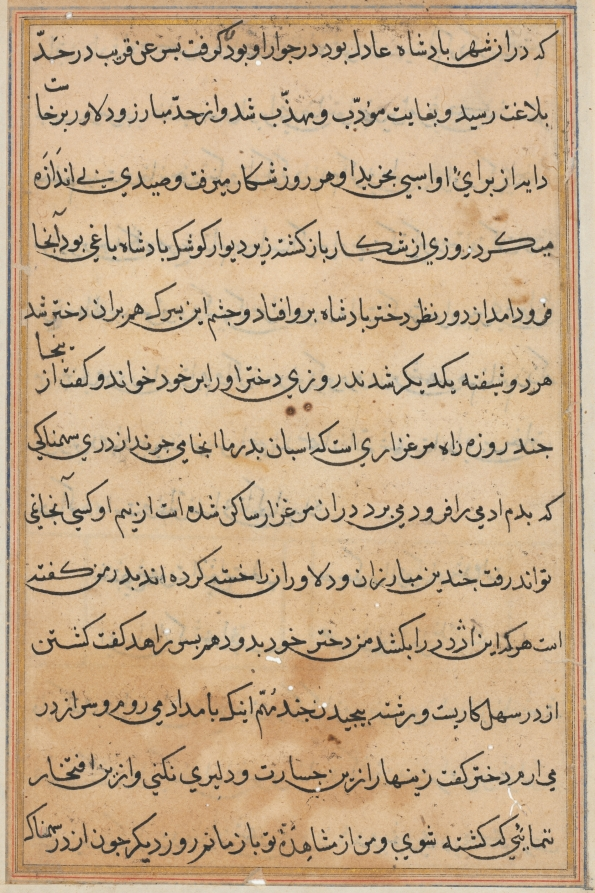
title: Page from Tales of a Parrot (Tuti-nama): text page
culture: Mughal India, court of Akbar (reigned 1556–1605)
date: c. 1560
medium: gum tempera, ink, and gold on paper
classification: Painting